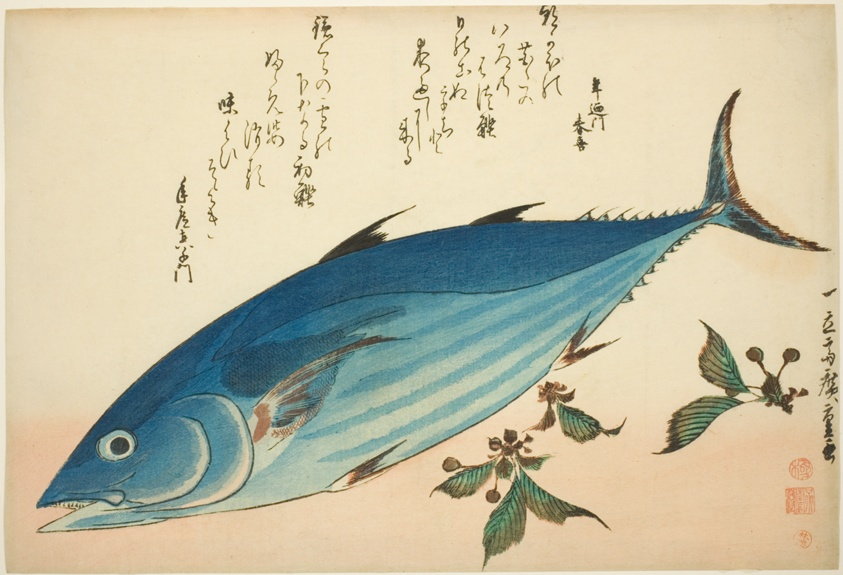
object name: Print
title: Bonito and saxifrage, from an untitled series of fish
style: Japanese (culture or style)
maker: Utagawa Hiroshige 歌川 広重; Japanese, 1797-1858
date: c. 1832/33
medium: Color woodblock print; oban, trimmed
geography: Japan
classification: woodblock print; print; asian art